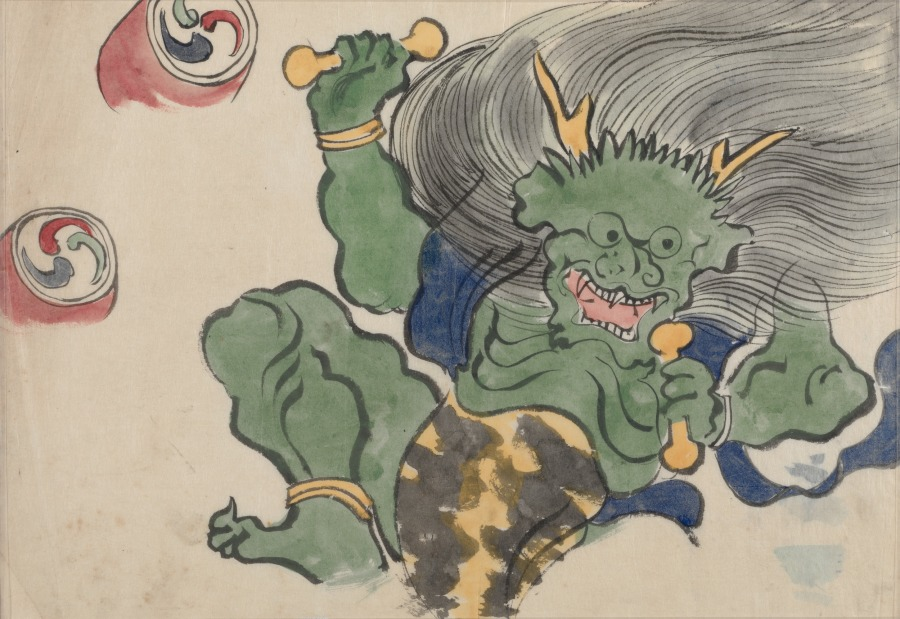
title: Flowers of a Hundred Worlds (Momoyogusa)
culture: Japan, Meiji period (1868–1912)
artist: Kamisaka Sekka (Japanese, 1866–1942)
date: 1909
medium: ink and color on paper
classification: Drawing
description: This is the cover for a group of 22 preparatory drawings for Kamisaka Sekka's print series Flowers of a Hundred Worlds.